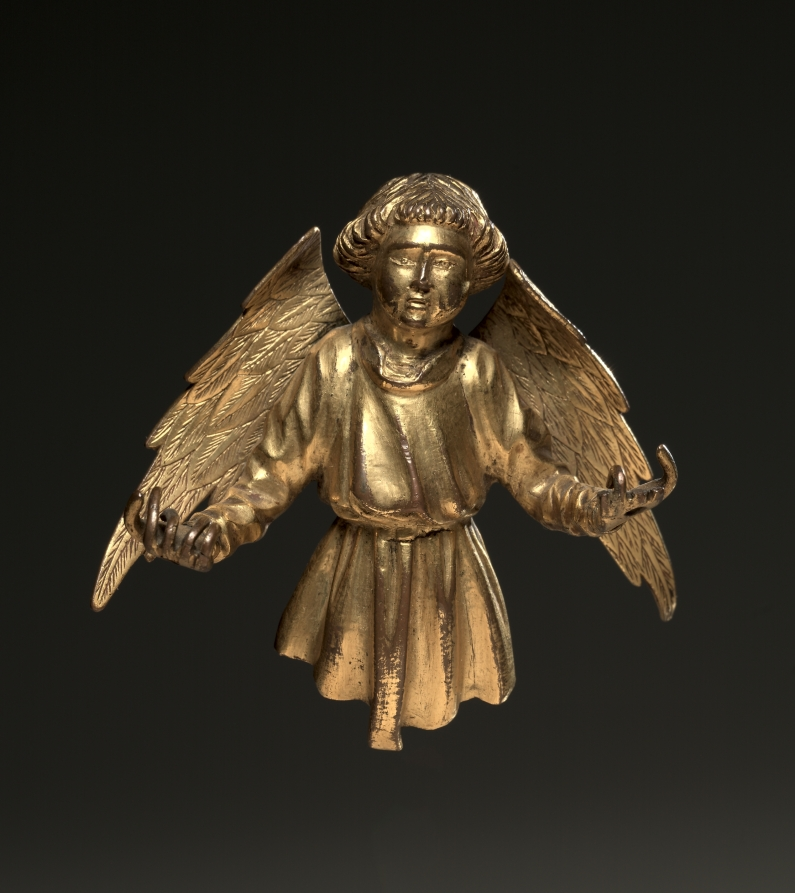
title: Angel from an Architectural Reliquary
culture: Franco-Netherlands or Paris, 15th century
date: c. 1400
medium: gilt bronze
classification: Sculpture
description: This beautiful Gothic angel is probably a surviving element from a large architectural reliquary. The last clue to its lost context disappeared when the symbolic attribute was twisted from the angel’s fingers, possibly during the destructive zeal of the French Revolution. The technique and style are characteristic of the lay workshops employed by the Valois courts during the early 1400s.